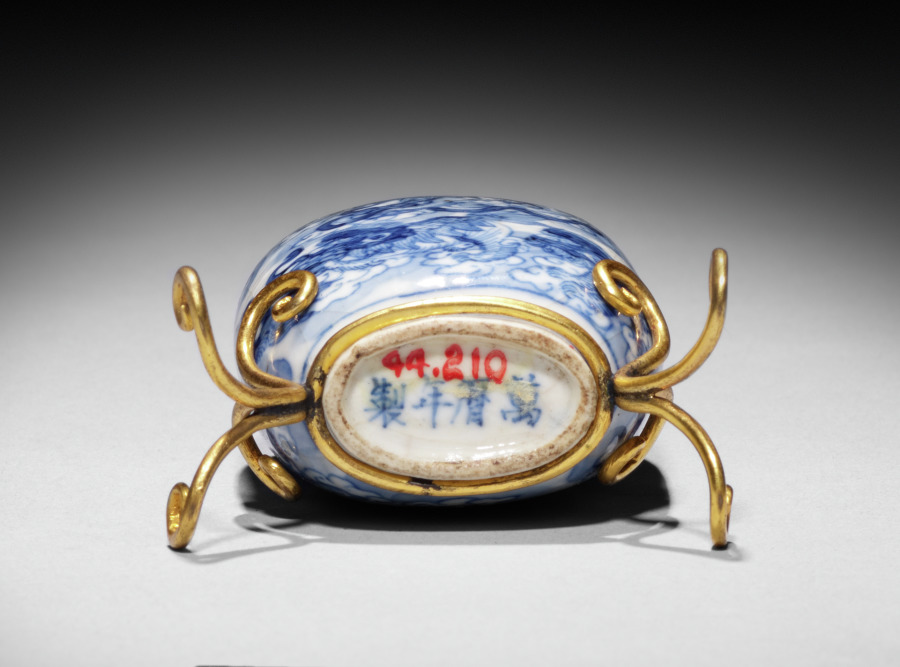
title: Flattened Ovoid Snuff Bottle with Stopper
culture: China, Jiangxi province, Jingdezhen kilns, Ming dynasty (1368-1644), Wanli reign (1572-1620)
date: 1573–1620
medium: porcelain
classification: Ceramic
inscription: 萬曆年製